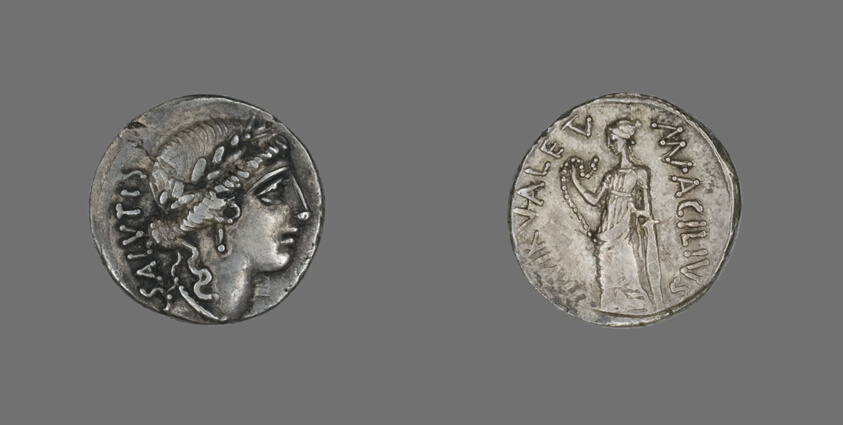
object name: Coin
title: Denarius (Coin) Depicting the Goddess Salus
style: roman (ancient, style or period), ancient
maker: Roman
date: about 49 BCE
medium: Silver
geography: Roman Empire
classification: coin; ancient art